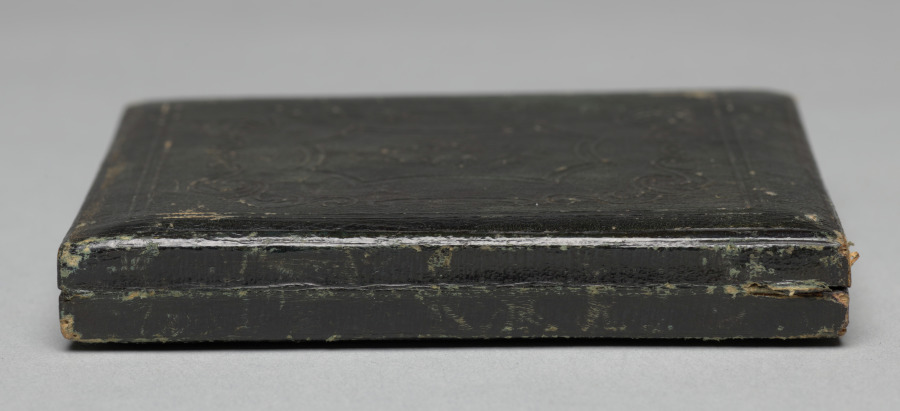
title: The Map Maker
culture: America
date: c. 1843–45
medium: daguerreotype, quarter plate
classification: Photograph